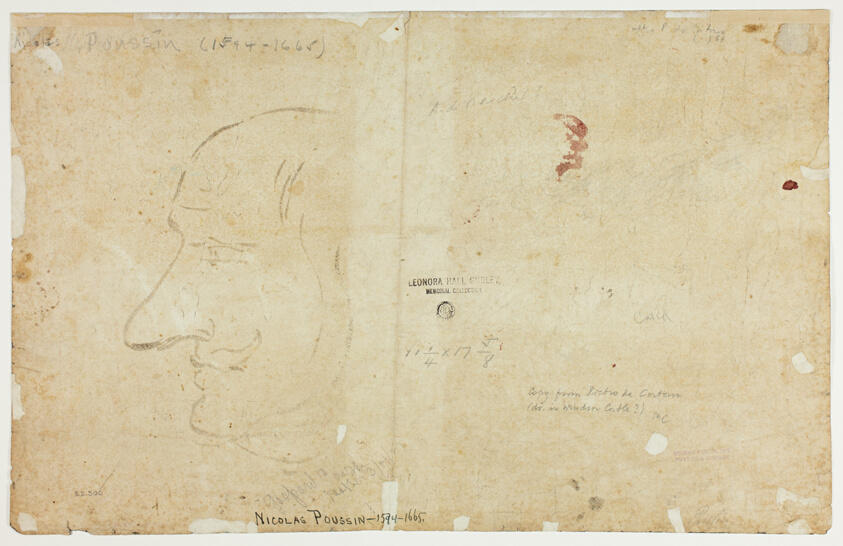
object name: Drawing and Watercolor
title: River Estuary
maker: Nicolas Pussin (French, 1594-1665); after Pietro da Cortona (Italian, 1596-1669)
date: 1675/99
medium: Sepia and wash on paper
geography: France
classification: wash; drawings (visual works); prints and drawing